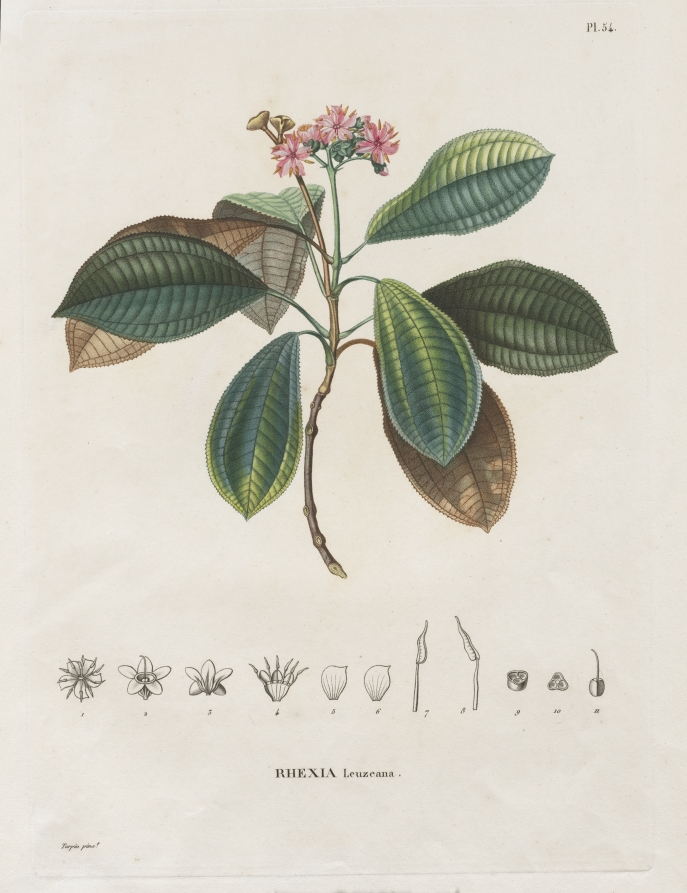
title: Voyage aux Régions équinoxiales du nouveau continent, fait dans les années 1709 à 1804: Monographie des melastomacées: No. 54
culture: Germany, 19th century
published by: Alexander, Freiherr von Humboldt (German, 1769–1859)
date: 1816–1823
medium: stipple engraving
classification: Print